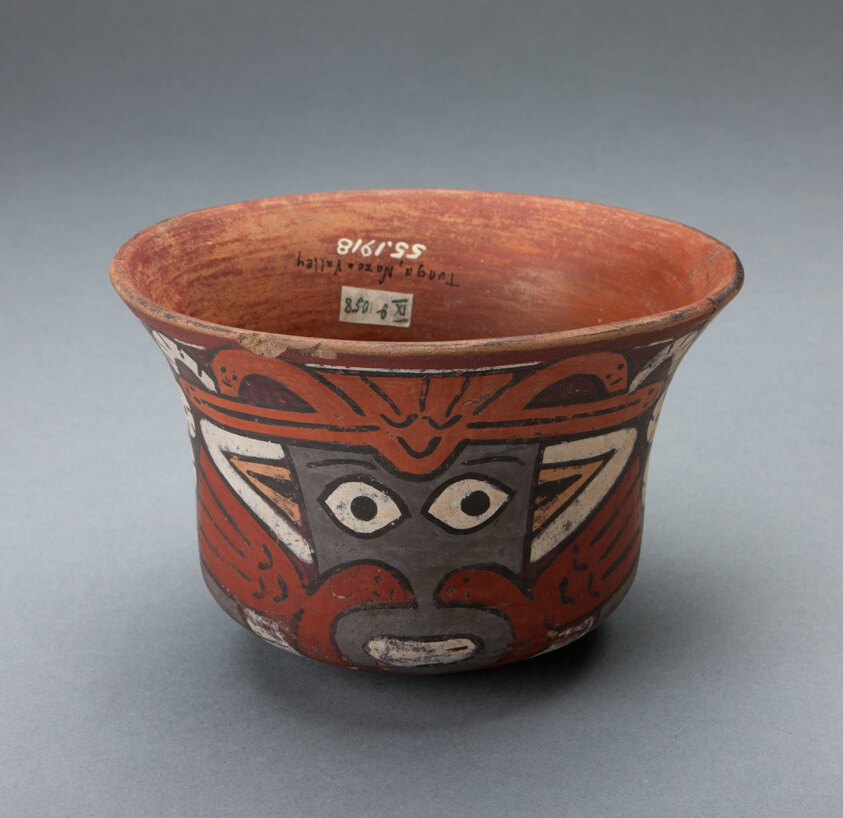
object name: Vessel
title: Cup Depicting Masked Ritual Performer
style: nazca, early intermediate period, Pre-Columbian, americas, Arts of the Americas, andean, andes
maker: Nazca; South coast, Peru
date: 180 BCE–500 CE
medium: Ceramic and pigment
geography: Nazca Valley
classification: earthenware; art of the americas; ceramics; vessel